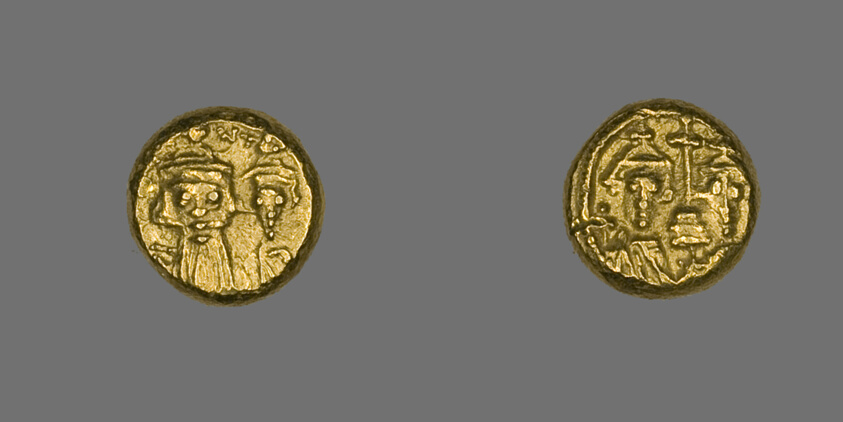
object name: Coin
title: Solidus (Coin) of Tiberius II Constantinus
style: byzantine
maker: Byzantine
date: 578–582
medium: Gold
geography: Roman Empire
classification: coin; ancient art